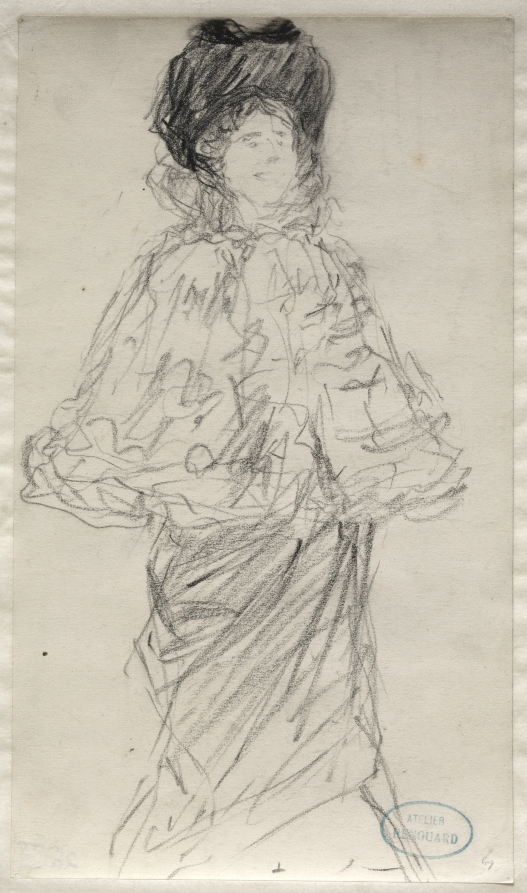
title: Standing Woman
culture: France, late 19th-early 20th century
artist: Charles Paul Renouard (French, 1845–1924)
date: c. 1900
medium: black crayon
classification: Drawing